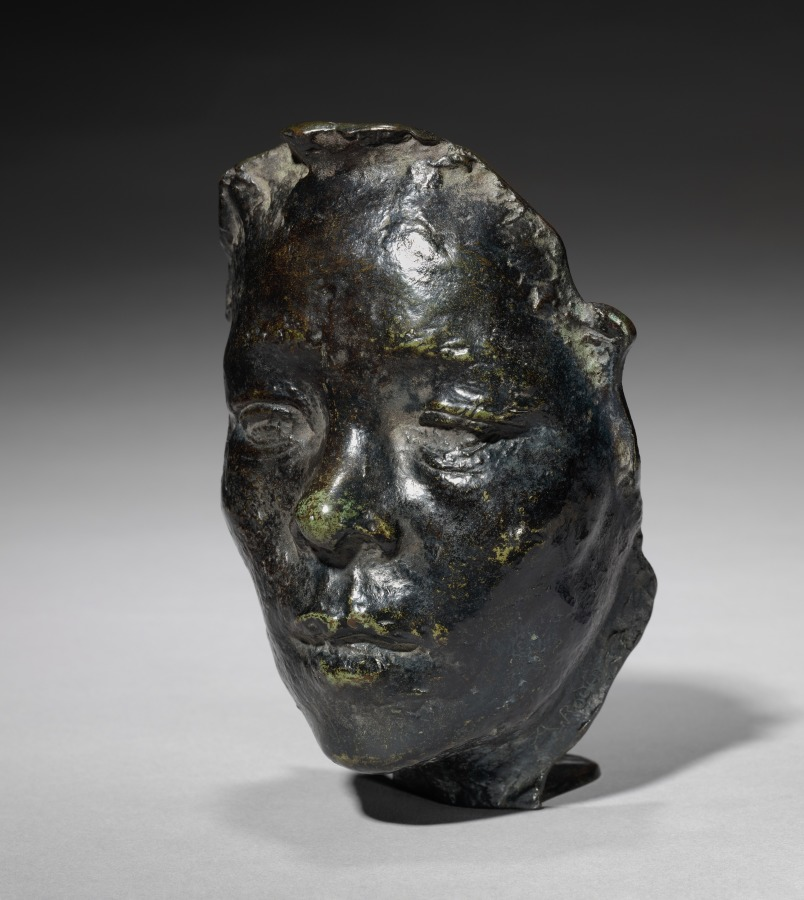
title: Mask of the Japanese Actress Hanako (Ohta Hisa)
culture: France, early 20th Century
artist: Auguste Rodin (French, 1840–1917)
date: 1908 (?)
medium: bronze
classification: Sculpture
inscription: Signed sinister side of neck: "A. Rodin"; inside sinister side in relief: "A. Rodin"